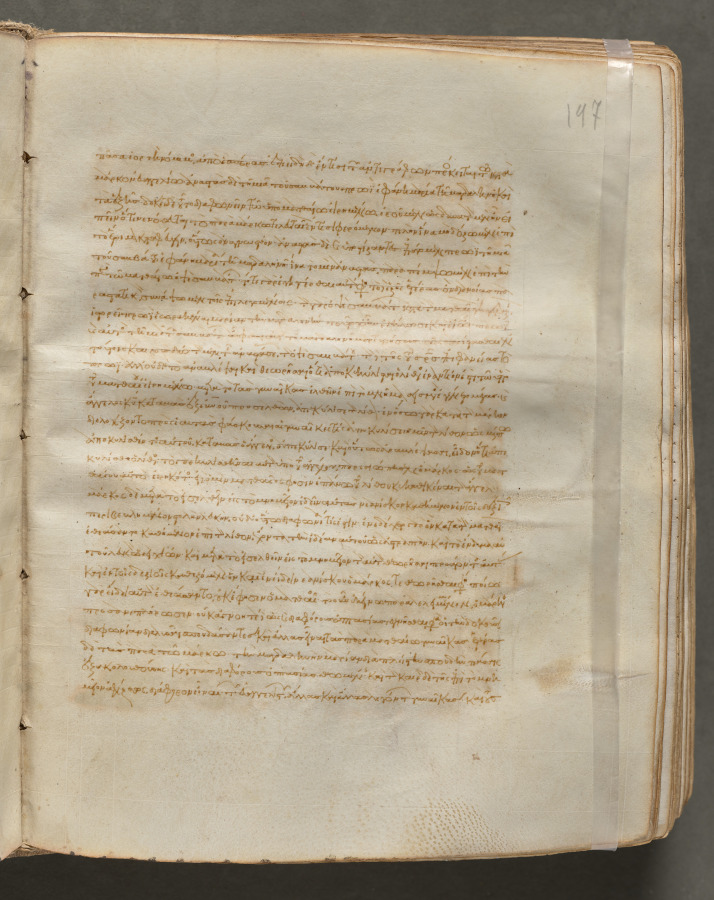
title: Text, folio 197 (recto), from a Gospel Book with Commentaries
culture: Byzantium, Constantinople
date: c. 1000–1100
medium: ink, tempera, and gold on vellum; leather binding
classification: Bound Volume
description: Each of the four gospels in this book opens on a page with brilliantly illuminated borders depicting the author of the text as well as birds-principally peacocks, symbols of the immortality of the soul-and fountains, representing the fountain of life and the salvation of the soul. This volume consists of 428 leaves with texts in Greek. Its level of sophistication suggests that it was probably written and decorated in a monastery in Constantinople.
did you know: Gospel Books were carried in procession through Byzantine churches.